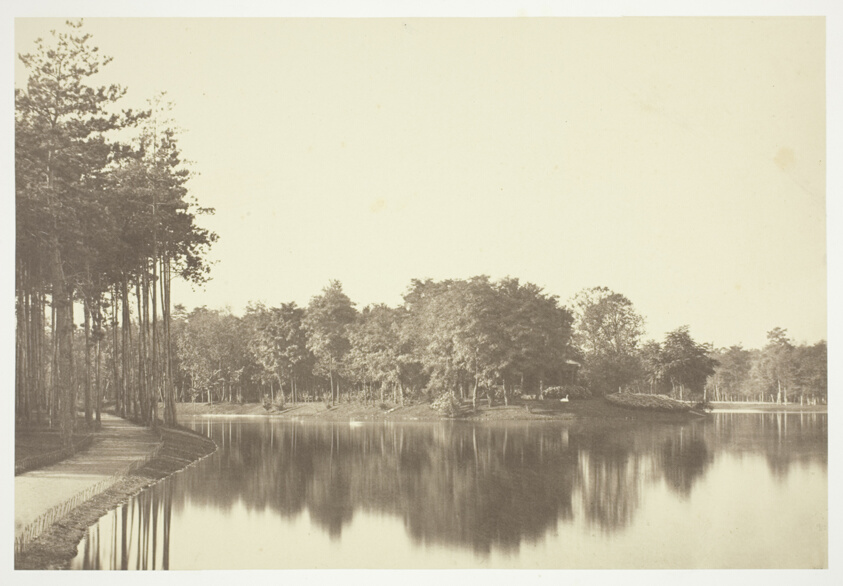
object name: Photograph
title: Untitled, from the series "Bois de Boulogne"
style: 19th century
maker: Charles Marville (French, 1813–1879)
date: c. 1850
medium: Albumen print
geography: France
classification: albumen silver print; photographic process; photography; photograph